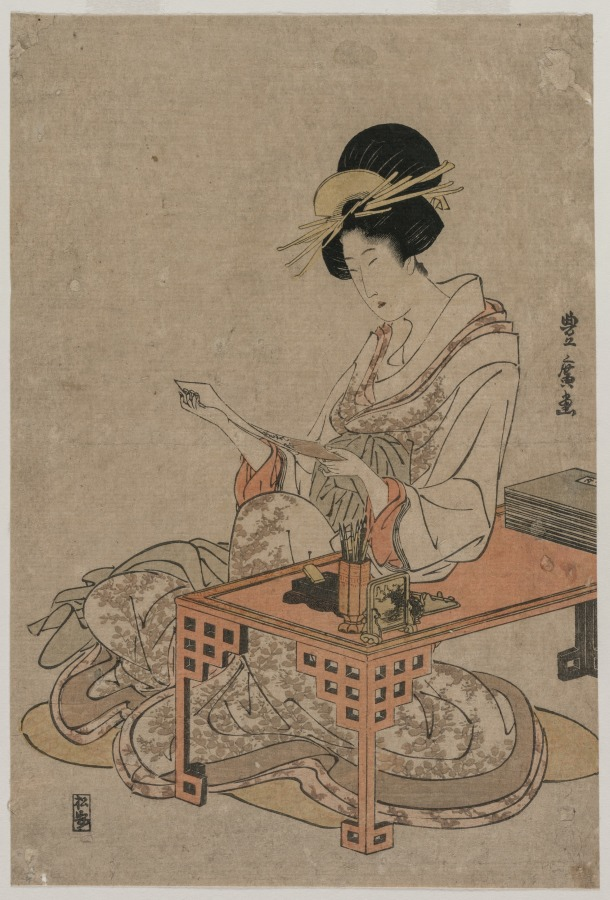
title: Courtesan Seated at a Writing Table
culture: Japan, Edo period (1615–1868)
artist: Utagawa Toyohiro (Japanese, 1733–1828)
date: c. late 1790s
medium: color woodblock print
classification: Print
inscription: Signature: Toyohiro ga Publisher: Matsuan